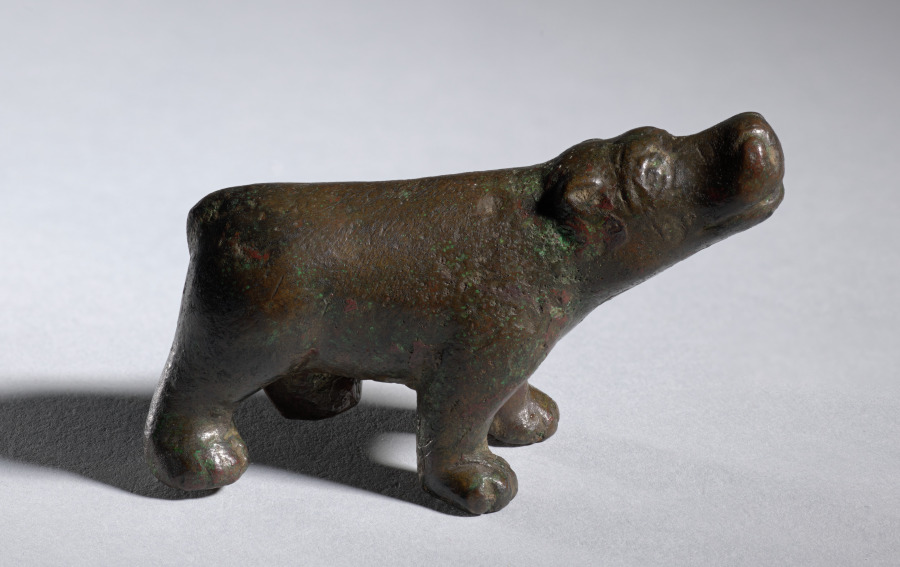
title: Hippopotamus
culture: Italy, Rome, Greco-Roman Period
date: 332 BCE–395 CE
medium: bronze, solid cast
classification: Sculpture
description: This hippopotamus steps forward with its rear left leg lifted off the ground and its head arched upwards. The hippopotamus was a Nilotic animal associated with Egypt and the Nile River that was brought to Rome and put on display in the Colosseum as part of venationes, or wild beast hunts. The rise of “Egyptomania” in the Roman Empire surged under the emperor Hadrian (reigned AD 117–38). Extant Egyptian examples of hippopotamus figurines are less animated and made of materials such as stone or pottery rather than bronze, making the pose and materiality of this object distinctly Greco-Roman.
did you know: The word hippopotamus is a Greek compound word combining “horse” (hippos) and “river” (potamos).